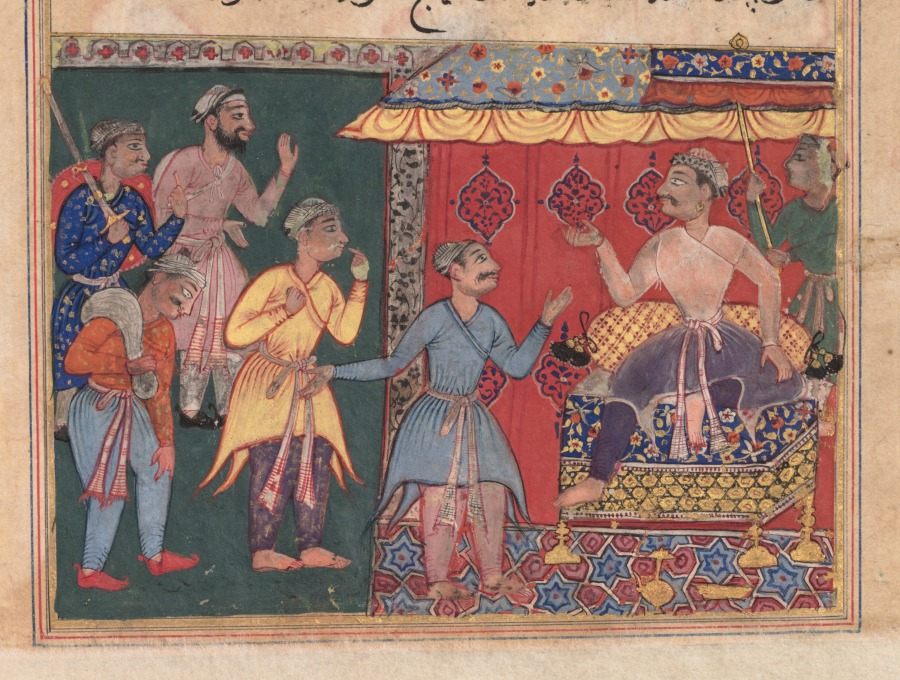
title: King Bhojaraja tries in vain to ascertain the whereabouts of the pearl from the four travelling companions, from a Tuti-nama (Tales of a Parrot): Twelfth Night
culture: Mughal India, court of Akbar (reigned 1556–1605)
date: c. 1560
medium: gum tempera, ink, and gold on paper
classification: Painting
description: Having arrived at the king's court, the streetcleaner laments that his priceless pearl was stolen, but he knows not by whom. The king summons the four travelers, but in spite of severe threats, none admits to the crime. The king sits on a golden seat with tent-like trappings behind him while an attendant holds the parasol of royalty over his head. Unable to discern who stole the pearl, the king calls for his clever daughter "who was so intelligent and resourceful in solving problems that she had instilled humility even in cunning and sagacious men." She related a story. From each of their reactions to the story, she was able to identify the thief, and the pearl was recovered.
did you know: The king’s trellised kulahdar turban is a vestige of pre-Akbar painting styles.